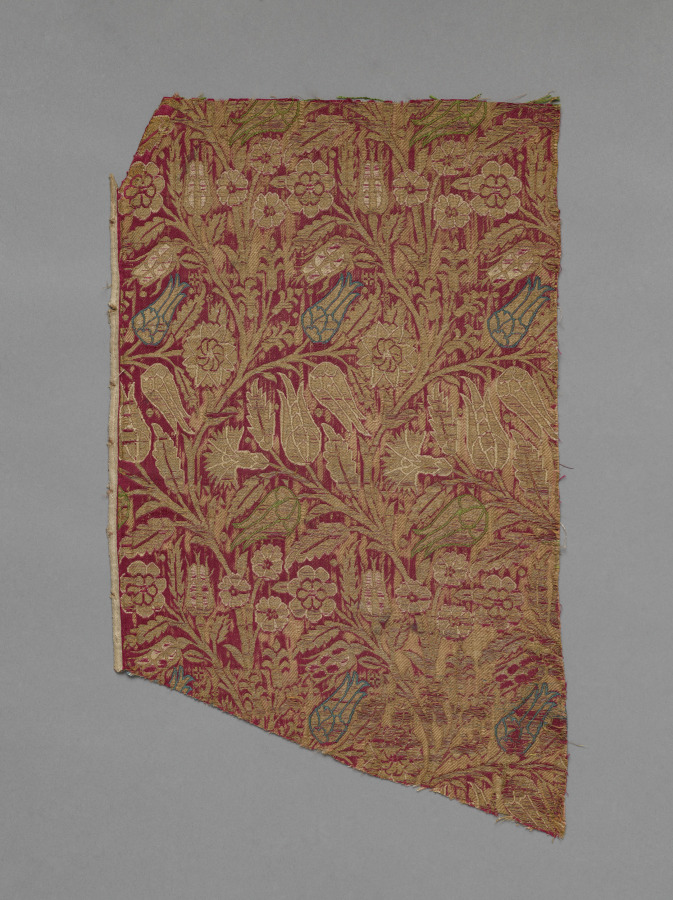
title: Textile Fragment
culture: Turkey, Bursa, 16th century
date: 16th century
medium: brocaded silk with metal thread weft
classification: Textile